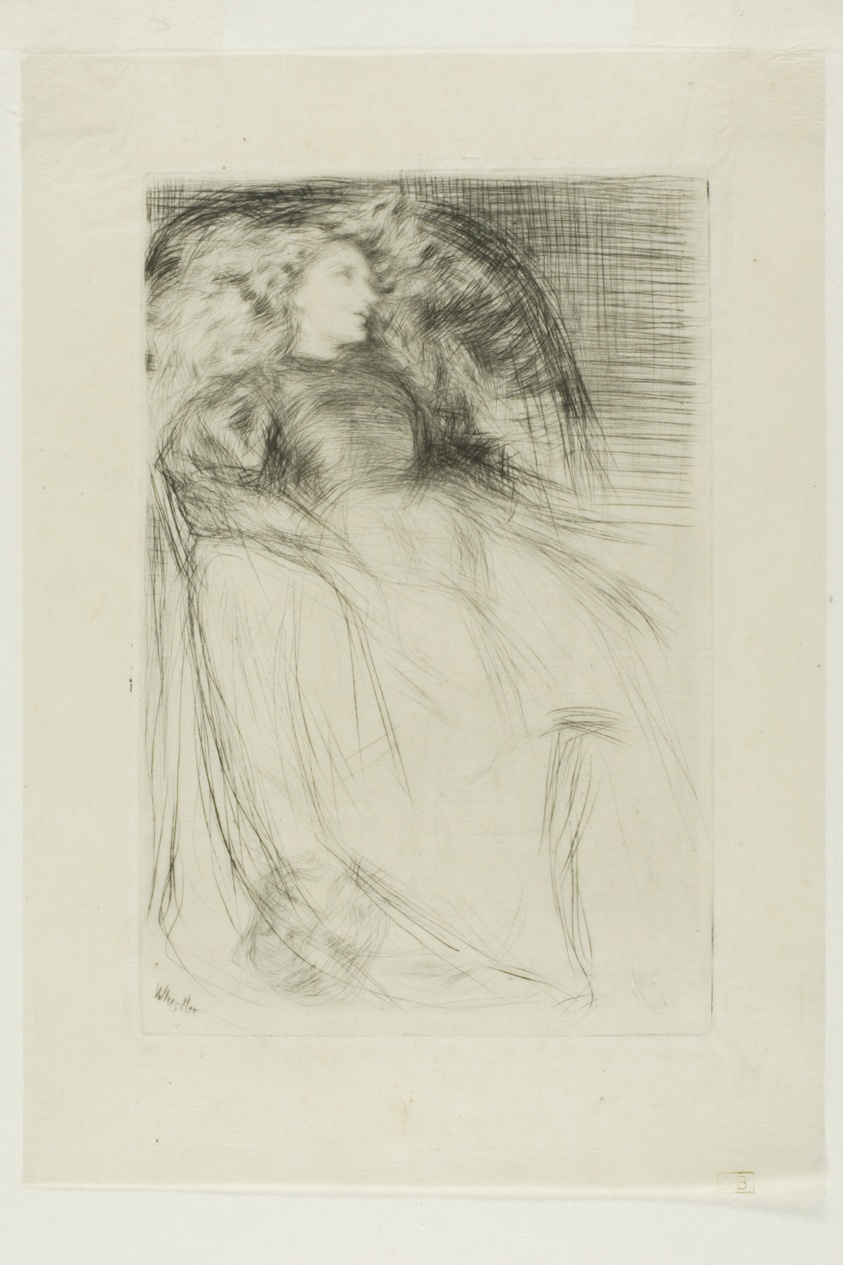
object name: Print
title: Weary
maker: James McNeill Whistler (American, 1834-1903)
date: 1863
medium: Drypoint in black ink on cream Japanese paper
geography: United States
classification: drypoint; print; prints and drawing; paper